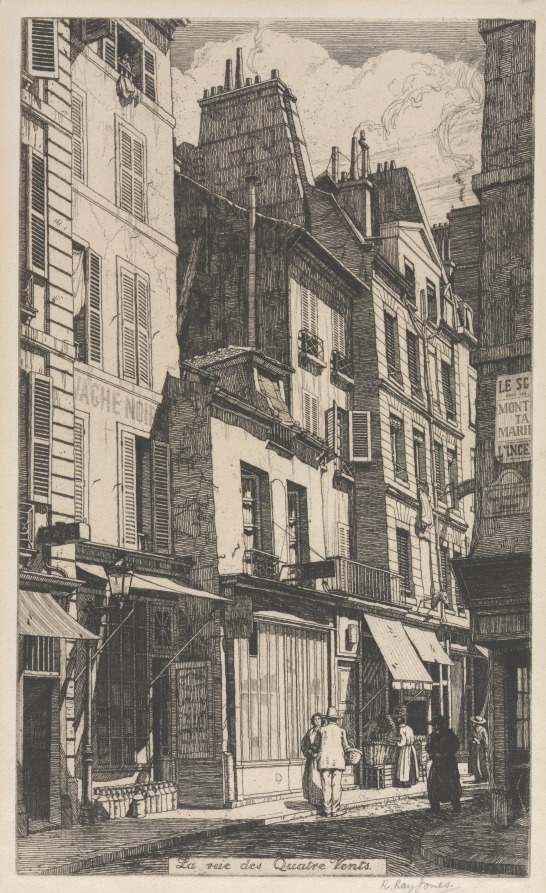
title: La rue des Quatre Vents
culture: England, 20th century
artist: Raymond Ray Jones (British, 1886–1942)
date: 1900s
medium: etching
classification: Print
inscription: lower right, in pencil: "R. Ray Jones"